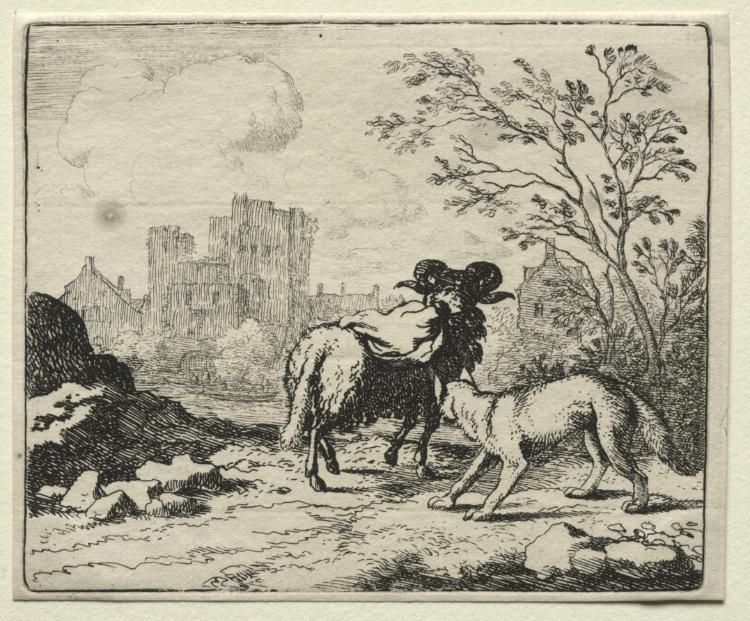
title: Reynard the Fox: Reynard Sends a Packet to the Lion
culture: Netherlands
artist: Allart van Everdingen (Dutch, 1621–1675)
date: 1650–75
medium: etching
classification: Print